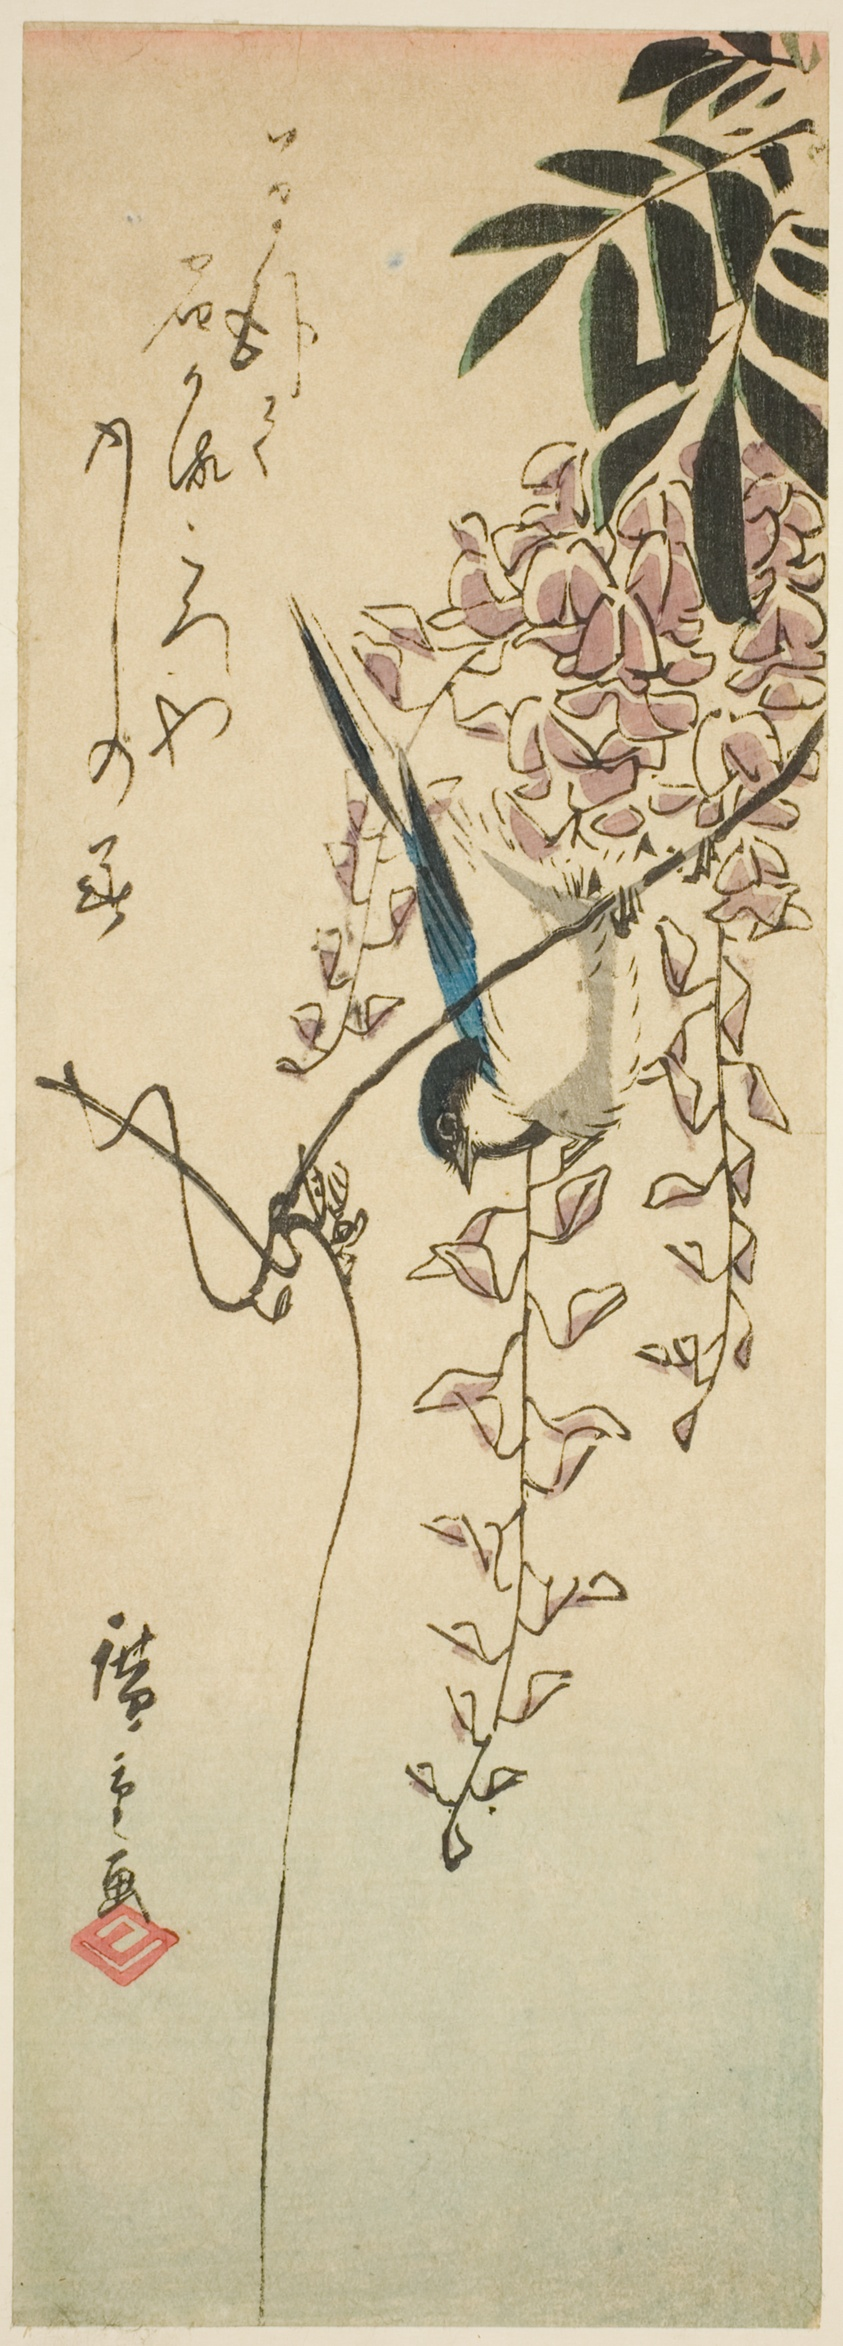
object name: Print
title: Bird on wisteria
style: Japanese (culture or style)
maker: Utagawa Hiroshige 歌川 広重; Japanese, 1797-1858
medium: Color woodblock print; aitanzaku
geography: Japan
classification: woodblock print; print; asian art